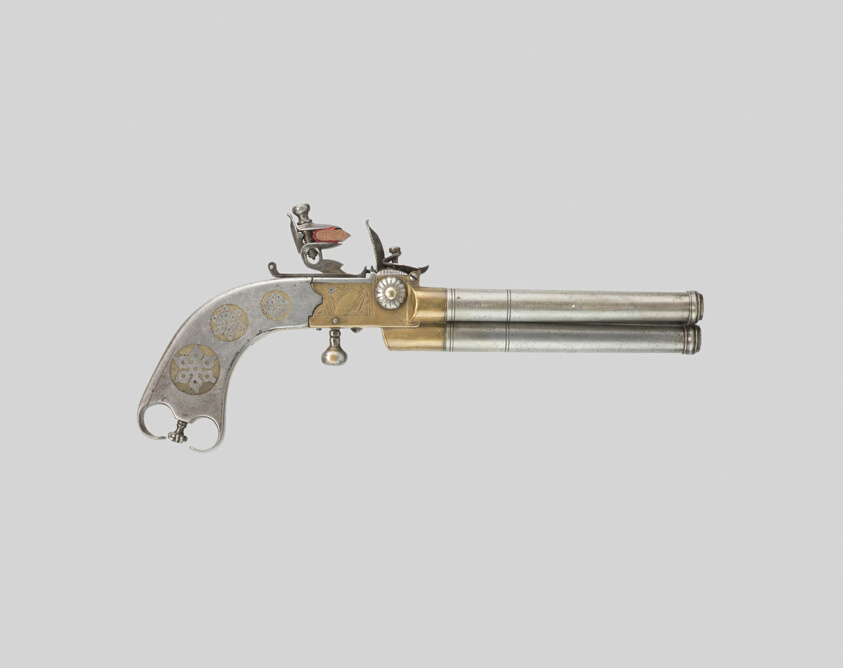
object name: Arms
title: Triple-Barrel Breechloading Flintlock Pistol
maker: English, Birmingham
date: c. 1820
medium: Steel and brass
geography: England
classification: firearm-handgun; arms; arms and armor